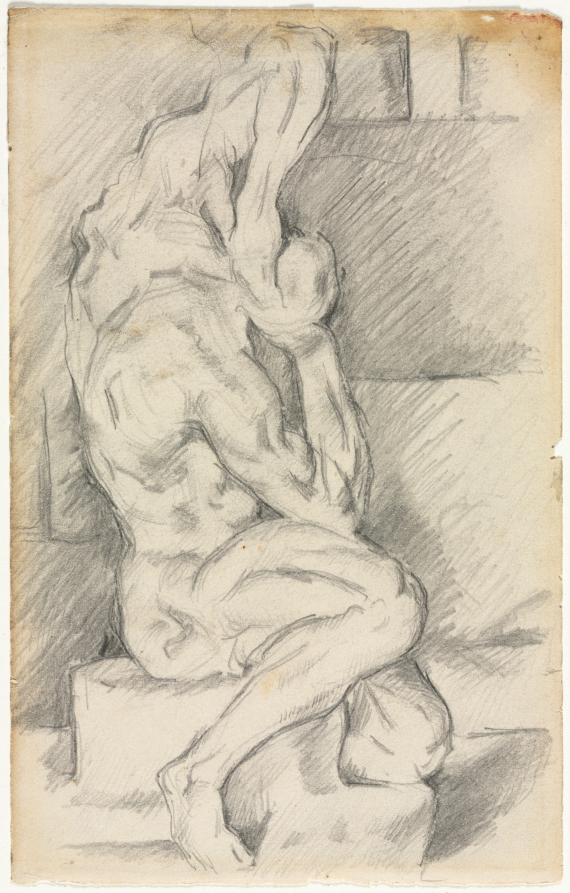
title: Sketch of Anatomical Sculpture (recto)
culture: France, 19th century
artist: Paul Cezanne (French, 1839–1906)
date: 1881/84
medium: graphite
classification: Drawing